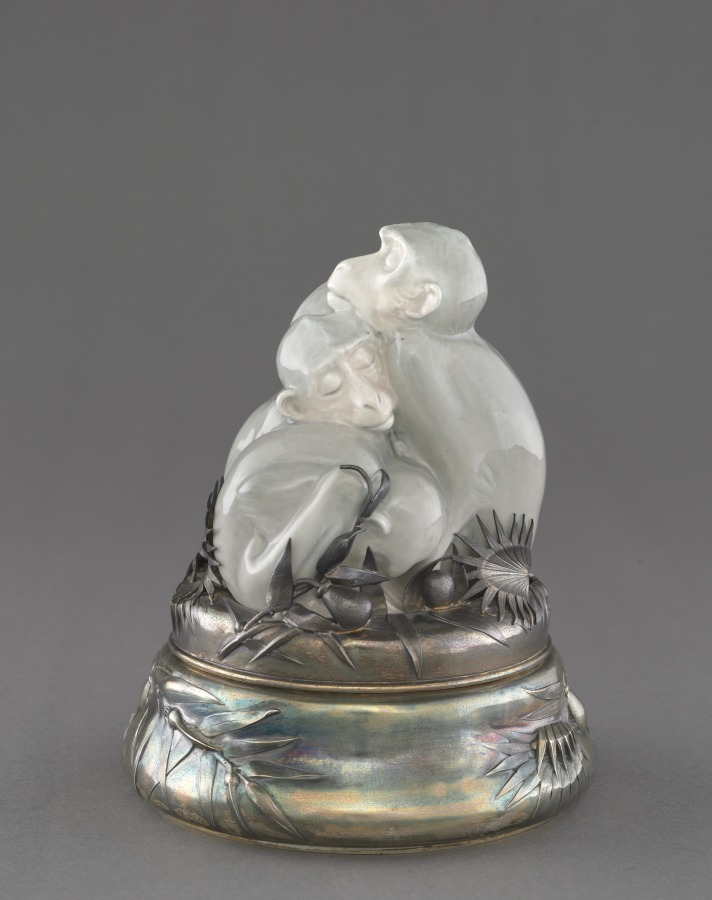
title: Monkey Figure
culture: Denmark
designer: Ingeborg Plockross-Iminger (Danish, 1872–1962)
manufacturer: Bing & Grøndahl (Danish, est. 1853)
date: c. 1900–1925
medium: porcelain, silver-gilt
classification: Sculpture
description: This figure featuring three monkeys was designed by the Danish ceramist Ingeborg Plockross-Iminger. The figure is displayed with a French silver mount that references Japonisme and Art Nouveau styles that were popular at the end of the 1800s and experienced a resurgence in the 1920s because of increased importation of Japanese goods to the West.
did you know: This ceramic figure usually stands alone, without a silver mounting.